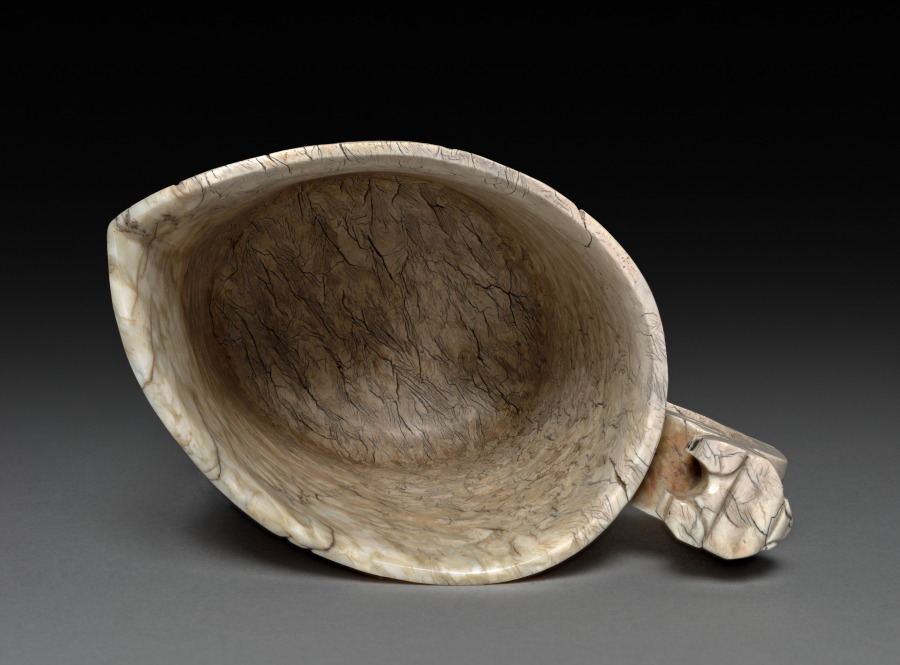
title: Ewer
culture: China, Ming dynasty (1368–1644)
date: 1700s or later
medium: jade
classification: Jade